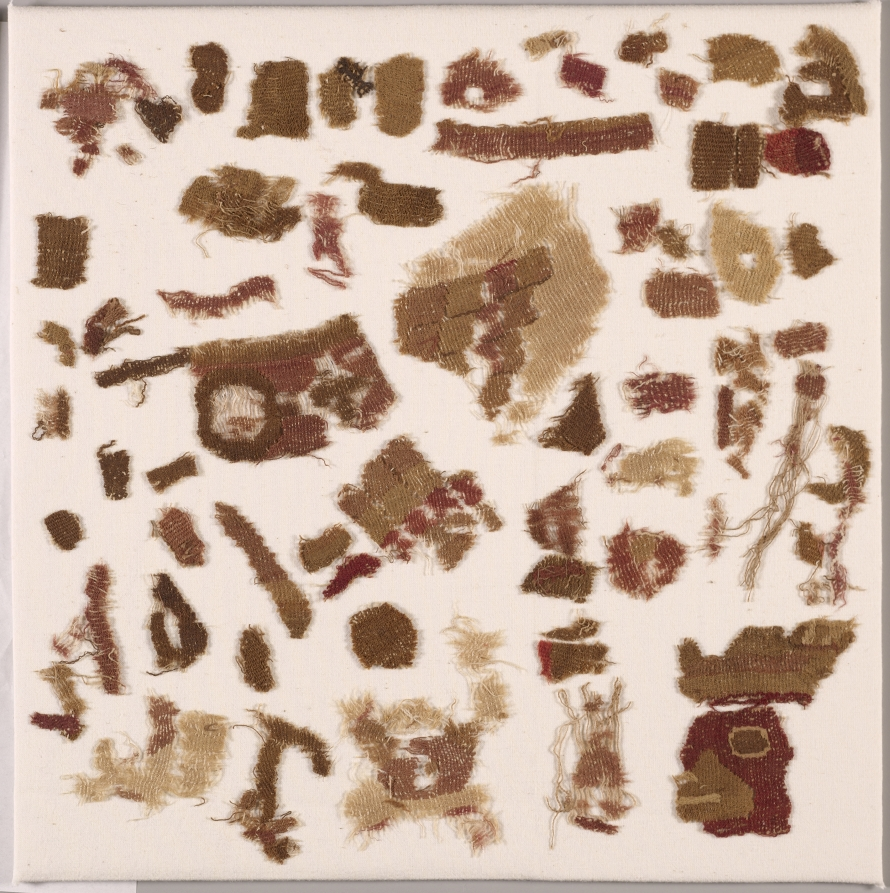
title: Textile Fragments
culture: Peru, Moche, north coast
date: c. 50–650 CE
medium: cotton and camelid fiber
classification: Textile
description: These fragments are rare survivors of catastrophic rains that destroyed much of the Moche textile legacy and may have helped to bring about the decline of Moche culture. Each depicts a serpent and a snail beneath a hovering raptorial bird—perhaps a snail kite, a type of hawk named after its favored food. The size of the motifs implies that the original textile was large; a mantle (a shawl-like garment) or a hanging are among the possibilities.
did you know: These fragments are rare survivors of floods that destroyed much of the Moche textile record.